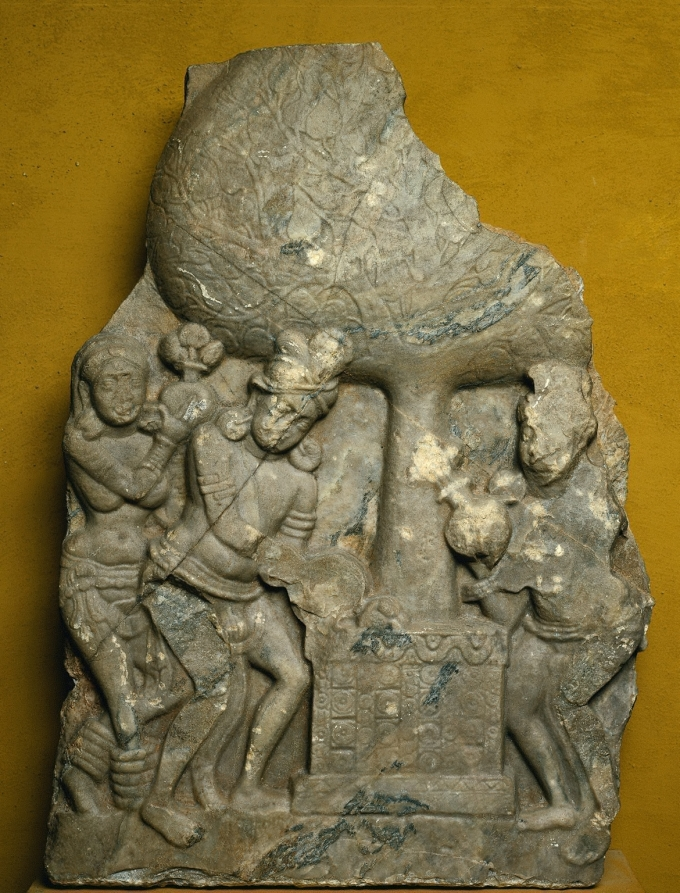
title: Worshippers at a sacred tree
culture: Southern India, Andhra Pradesh, possibly Chandavaram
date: about 50 BCE to 50 CE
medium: limestone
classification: Sculpture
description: The square railing surrounding the base of the trunk is the marker of a sacred tree. This tree has the distinctive heart-shaped leaves of the Bodhi tree (ficus religiosa), which is the type of tree under which the Buddha reached enlightenment. Each of the the worshippers holds a narrow-necked pot with lotus flowers emerging from the mouth. The lotus flowers are a symbol for water, so these figures are pouring offerings of pure water to the sacred tree.